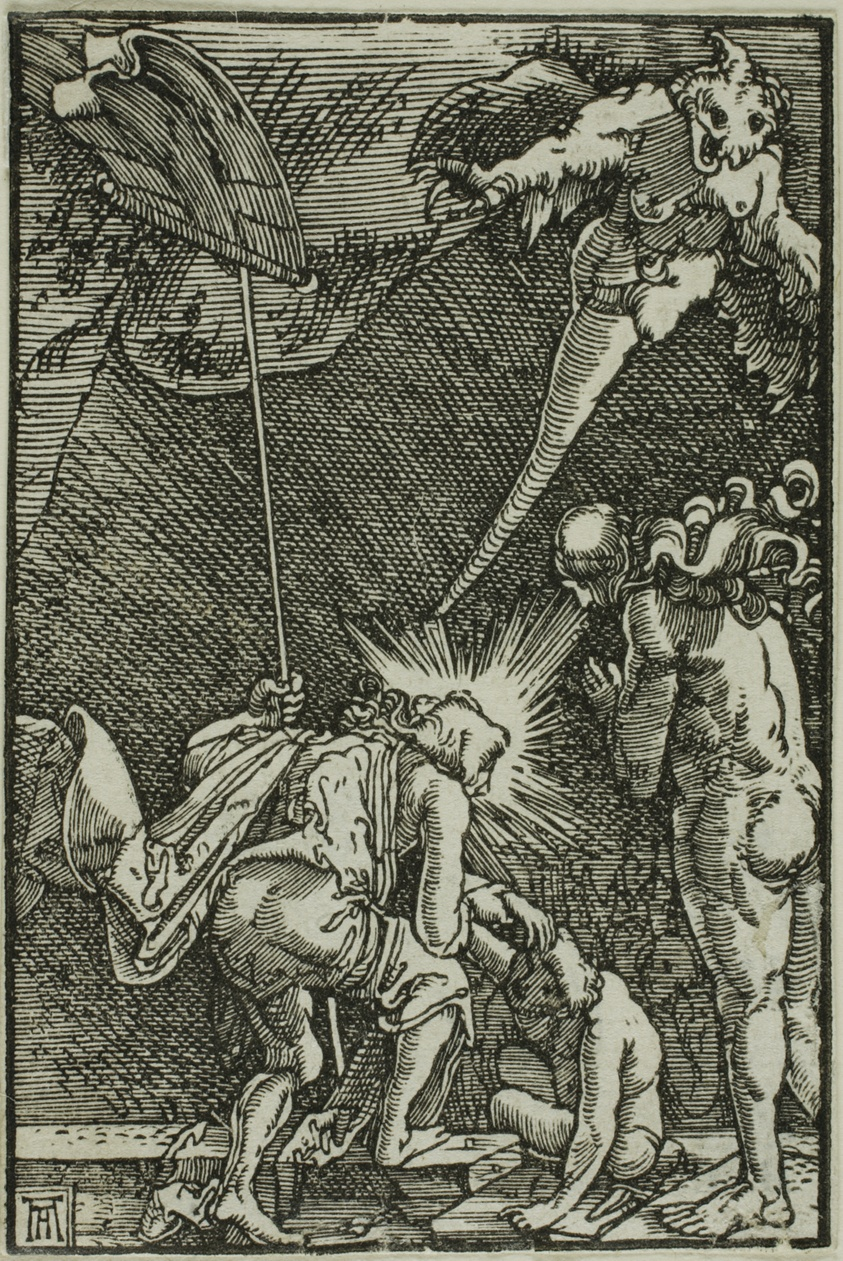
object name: Print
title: Christ into Limbo, from The Fall and Redemption of Man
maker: Albrecht Altdorfer (German, c.1480-1538)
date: 1513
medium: Woodcut in black on ivory laid paper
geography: Germany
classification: woodcut; print; prints and drawing